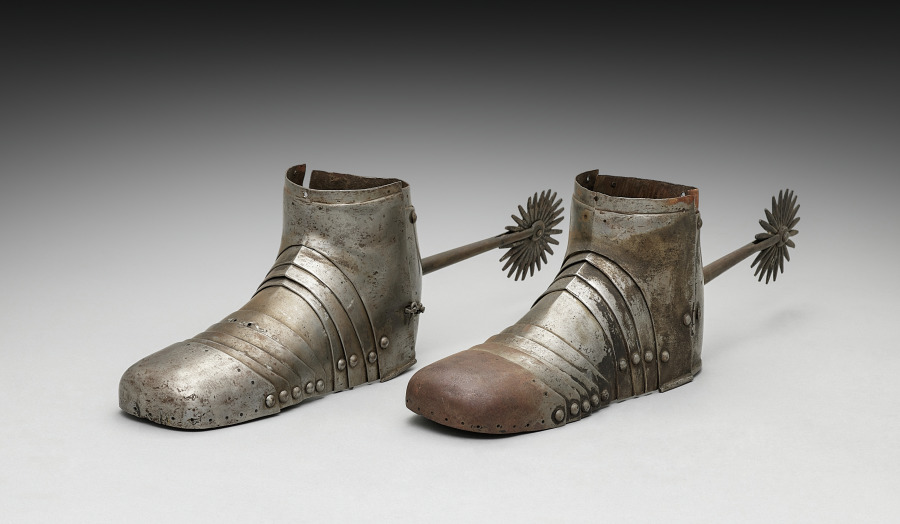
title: Right Sabatoun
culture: Germany, 19th century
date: 1801–1900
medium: steel with black paint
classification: Arms and Armor